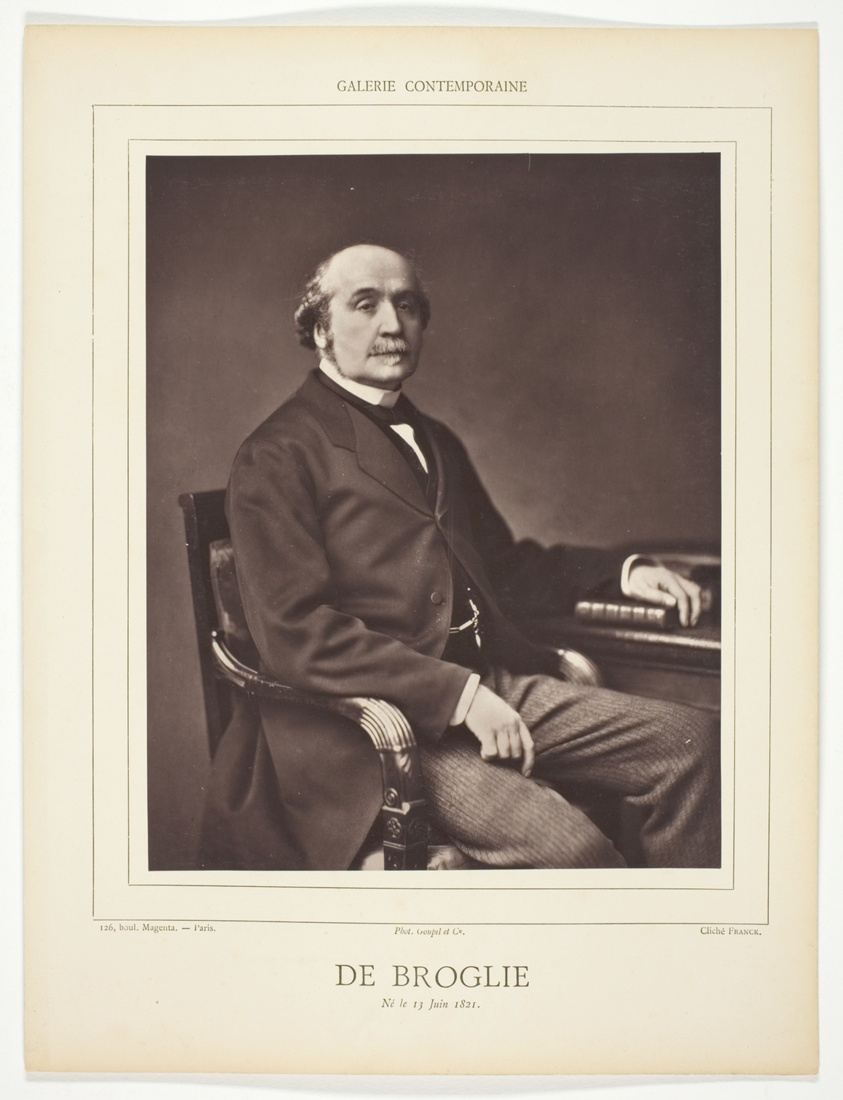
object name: Photograph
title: de Broglie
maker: Franck (probably French, 19th century)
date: 1975/77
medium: Woodburytype, from the periodical “Galerie Contemporaine Littéraire, Artistique” (1877), volume 4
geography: France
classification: woodburytype; photomechanical process; photography; photograph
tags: Collected by Hugh Edwards, Contemporaine Littéraire